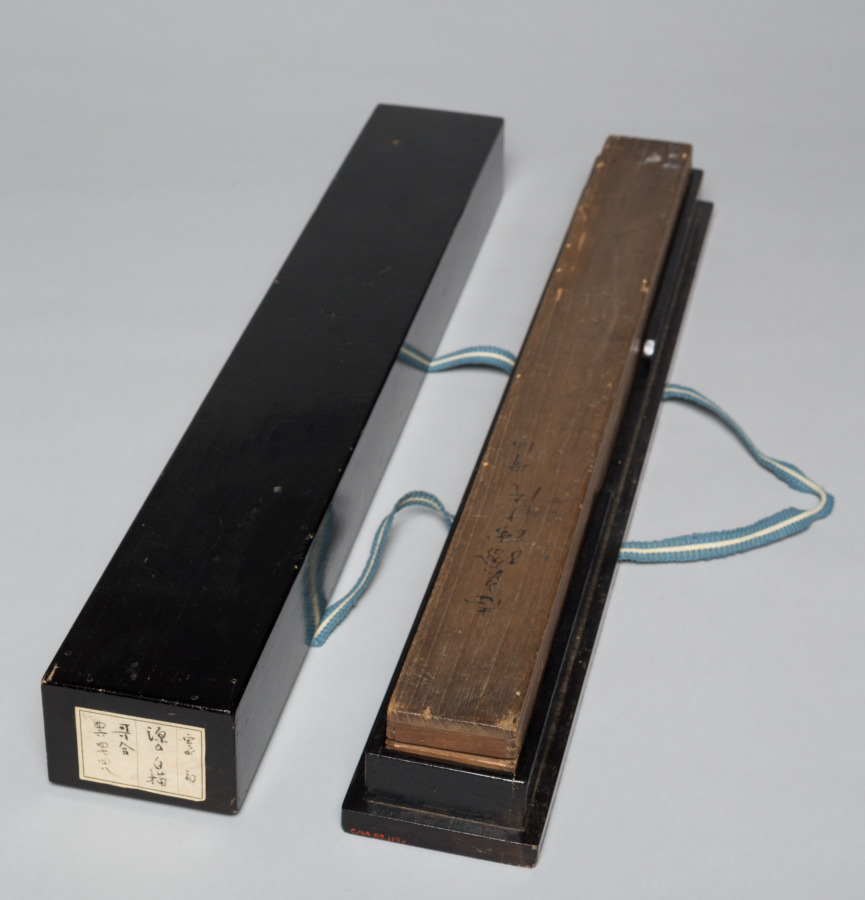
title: Section of an Illustrated Tale of Genji Poetry Contest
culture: Japan, Muromachi period (1392–1573)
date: 1400s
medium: section of a handscroll mounted as a hanging scroll; ink on paper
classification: Painting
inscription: 四十六番 左 ひげくろの大将 心さえ空にみだれし雪の［も」夜に ひとりさえつるかたしきの袖／ 四十七番 うきことを思ひさわ げばさまざまに くゆるけむりぞ いとど たち そふ／ 四十八番 すがくれてかず にも あらぬ かりのこを いづかたにかはとりかくすべき／ 右 雲井のかり かぎりとてわすれがたきを わするるも こや世に なびくこころな るらむ／ あさきなを いひ ながしける かわ ぐちは いかが もらしし せきのあらがき／ あわれをもいかに しりてか なぐさ めむ あるや 恋しき なきや かなしきに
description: This hanging scroll was once part of a handscroll depicting a waka (thirty-one syllable verse) poetry contest between characters from the 11th-century literary classic Tale of Genji. In this section, a woman known informally as Kumoi no kari, or “Goose in Fog,” after a lovelorn line she hums in the novel, is pitted against Higekuro no taishō, or “General Blackbeard.” Three of his poems, numbered 46 to 48, from “The Handsome Pillar” chapter appear over his image. The subsequent three poems inscribed above Kumoi no kari are presented as her “responses,” and come from "The Plum Tree Branch", “New Wisteria Leaves”, and "Evening Mist" chapters.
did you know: General Blackbeard laments having smelly ash poured upon him by his angry wife in one of the poems.